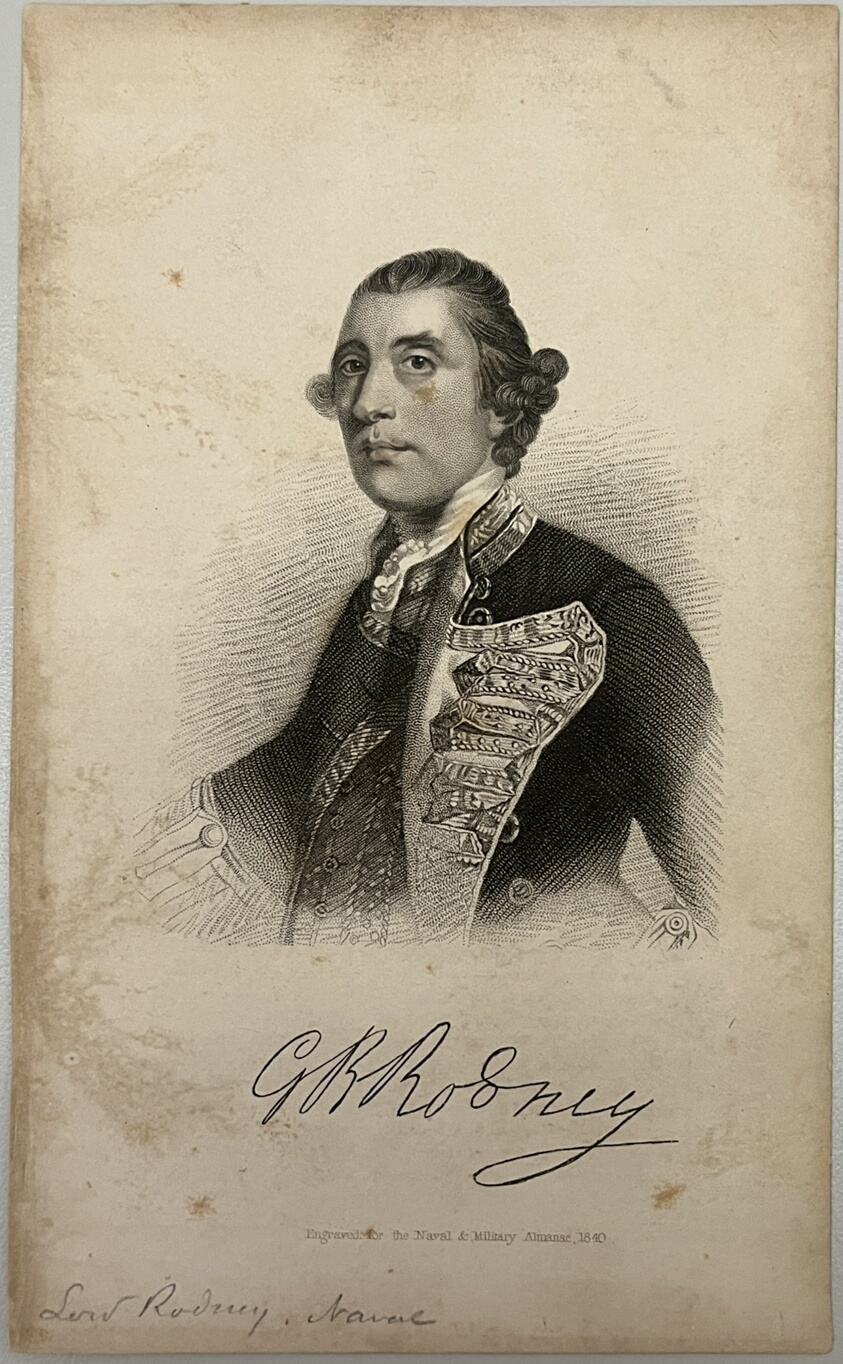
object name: Print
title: G.B. Rodney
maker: Artist Unknown (Likely British, 18th century)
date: 1840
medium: Stipple engraving on paper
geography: England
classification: reproduction; print; prints and drawing